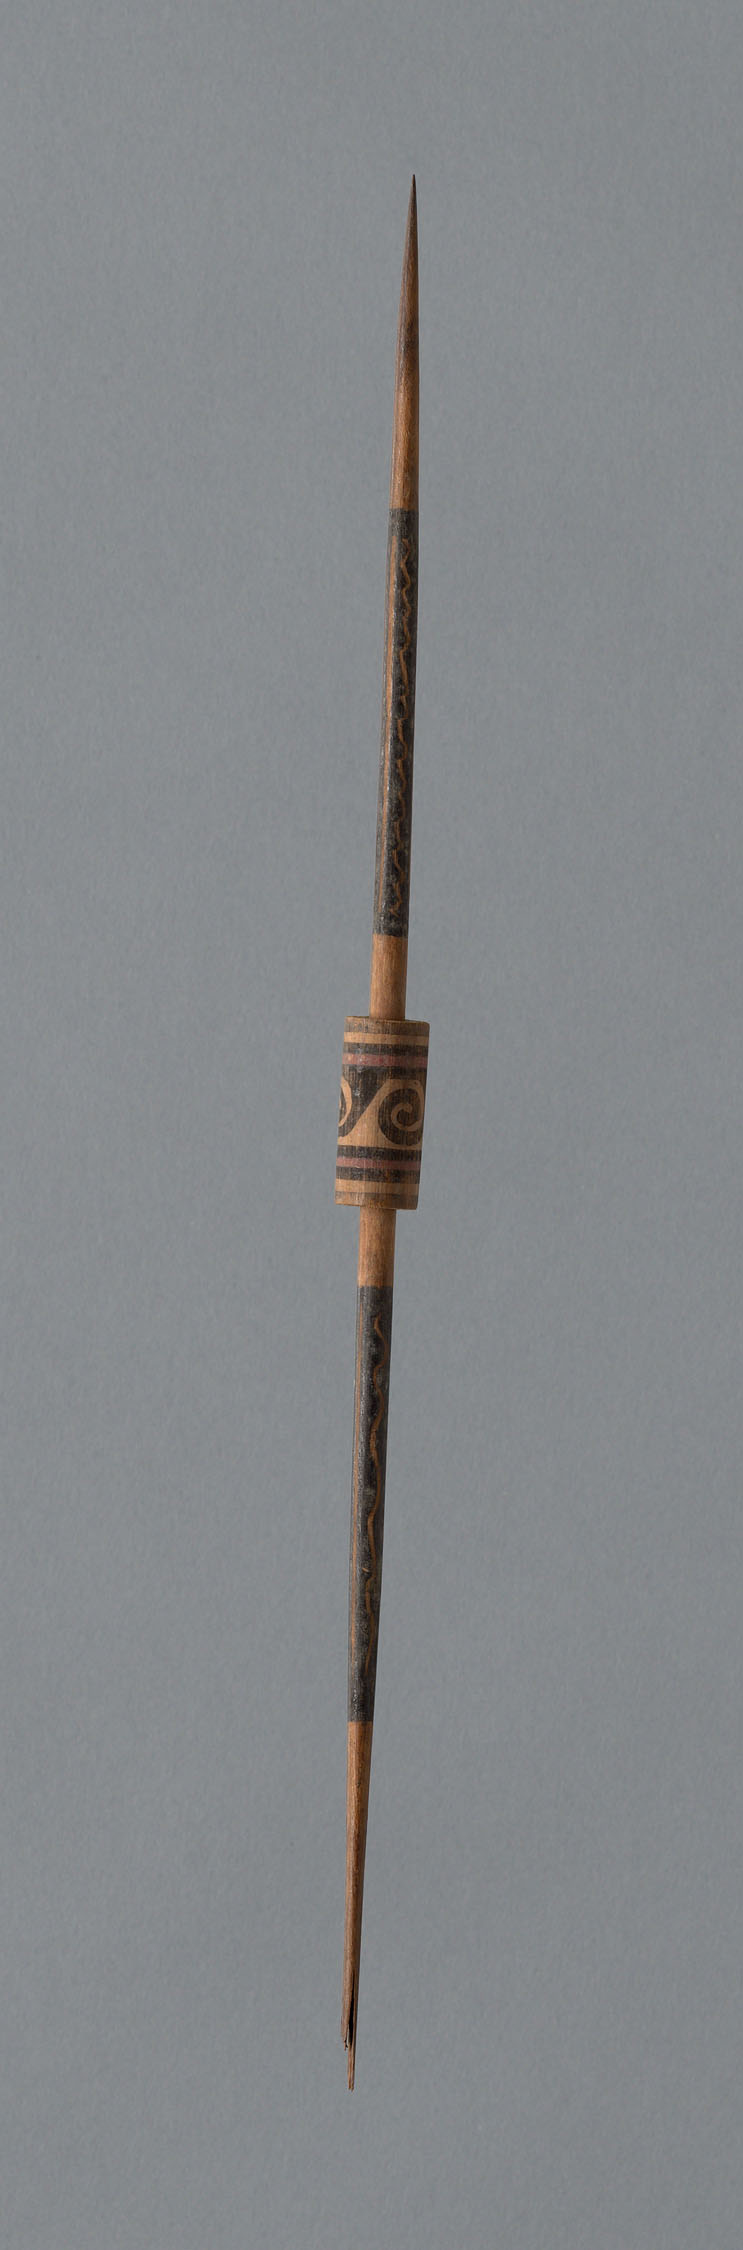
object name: non-art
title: Wooden Spindle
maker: Peru, Possibly central coast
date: 1000/1476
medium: Wood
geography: Peru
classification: spindles (textile working equipment); textile working equipment; accessories (object genre); textile